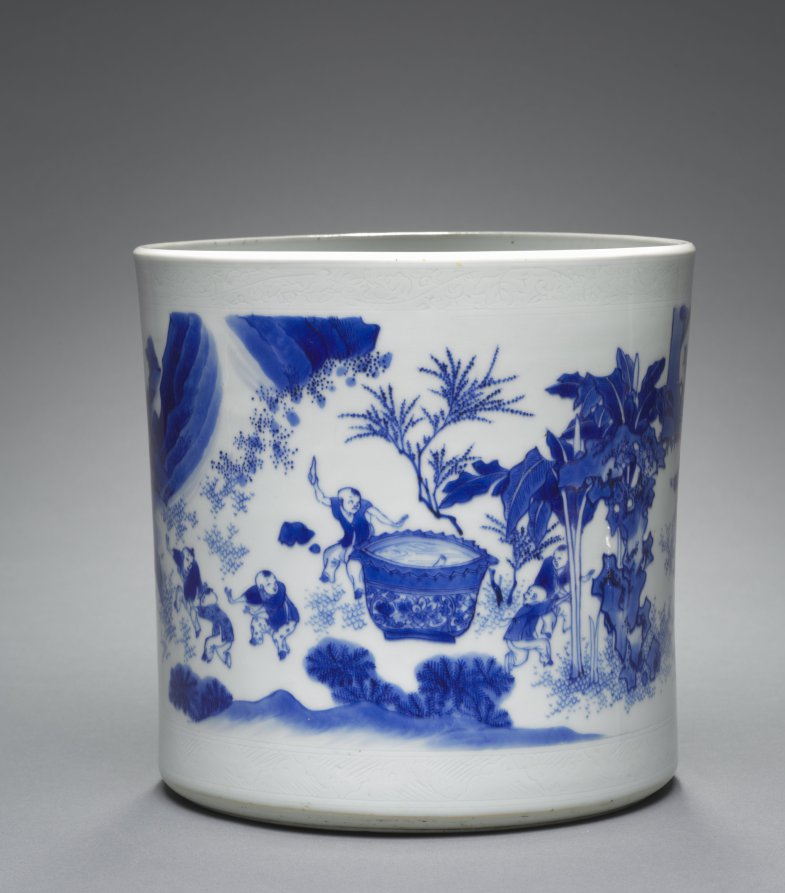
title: Brush Pot with Episode from Life on Sima Guang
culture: China, Jiangxi Province, Jingdezhen, Qing dynasty, Shunzhi period (1644–61)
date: 1628–61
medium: porcelain with underglaze blue decoration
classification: Ceramic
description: Painted in a continuous scene around the cylindrical body is an episode from a folktale about Sima Guang (1019-86), a renowned Northern Song statesman and scholar who exercised quick thinking in his childhood when he broke a ceramic vat filled with water to rescue a drowning playmate